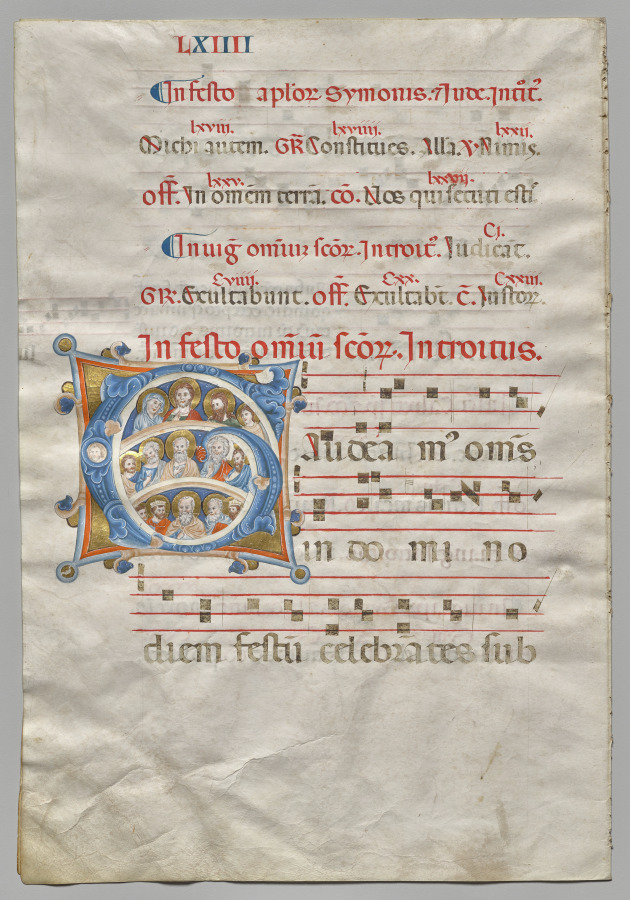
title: Bifolio from a Gradual: Initial (G) with Christ, the Virgin, and Apostles and Initial (O) (recto)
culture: Italy, Siena(?)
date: c. 1300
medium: Ink, tempera, and gold on vellum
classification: Manuscript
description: The large decorated initial G introduces the text, Gaudeamus omnes in Domino (Let us rejoice in the Lord). It is the beginning of the opening prayer, or introit, of the Mass for the Feast of All Saints (November 1). The figures within the initial include Christ, the Virgin Mary, and various saints.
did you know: Words written in red ink, called rubrics, indicate titles and chapter headings that are not part of a manuscript’s main text.